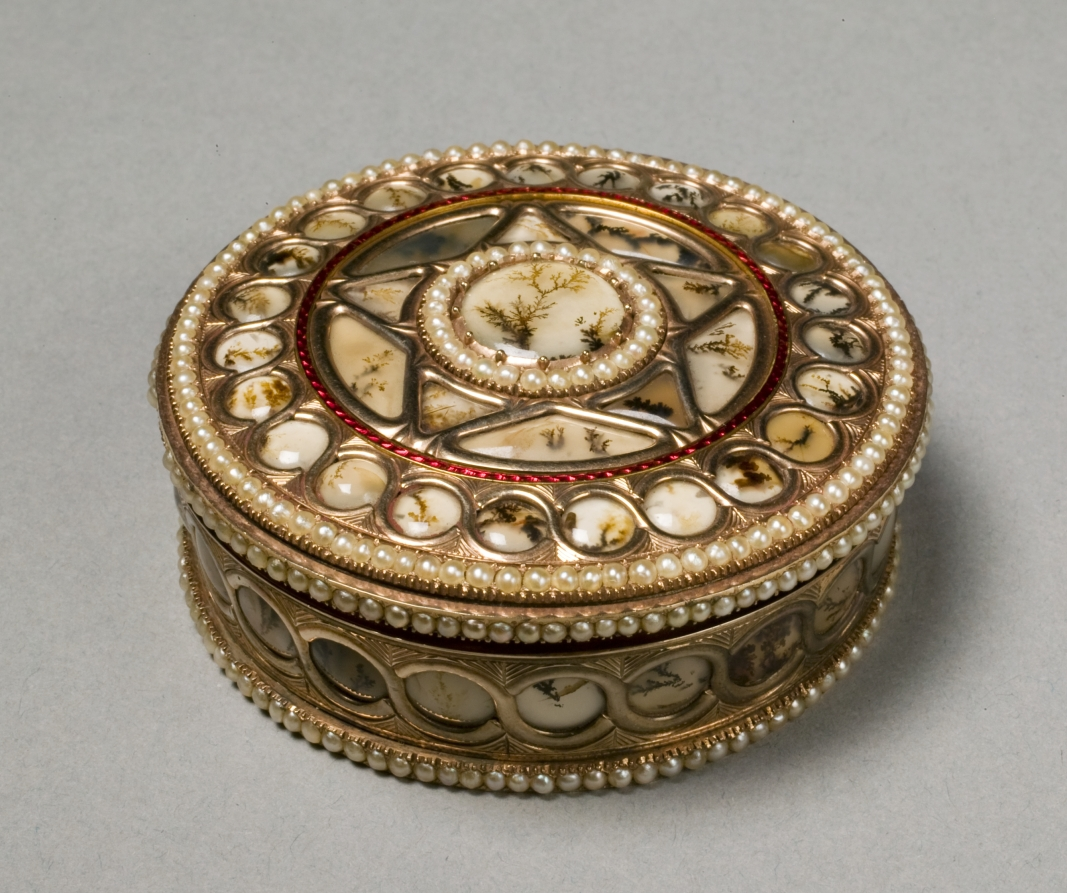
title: Snuff Box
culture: Germany or England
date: c. 1790–1810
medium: gold, agate, pearls, enamel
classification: Miscellaneous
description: Luxurious personal objects, like this snuff box, were an essential part of a privileged wardrobe during the 1700s and early 1800s, emphasizing their owner’s refinement and wealth. Their glittering surfaces, however, disguised a system based on the labor and suffering of enslaved or indentured people, whether in gold or stone mines, tobacco farms, or shops where these goods were made. Like cotton, sugar, and tea, snuff came from British colonies in America, India, and the Caribbean, where enslaved people were exploited to grow these crops under extremely harsh conditions. Slavery was not abolished in much of the British Empire until 1833. Britain and other European nations continued to pursue colonialism with a sense of superiority that found its way into all aspects of life, including decorative objects glorifying their conquests.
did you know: This small, elaborate box held snuff, a form of powdered tobacco that was inhaled in tiny amounts.